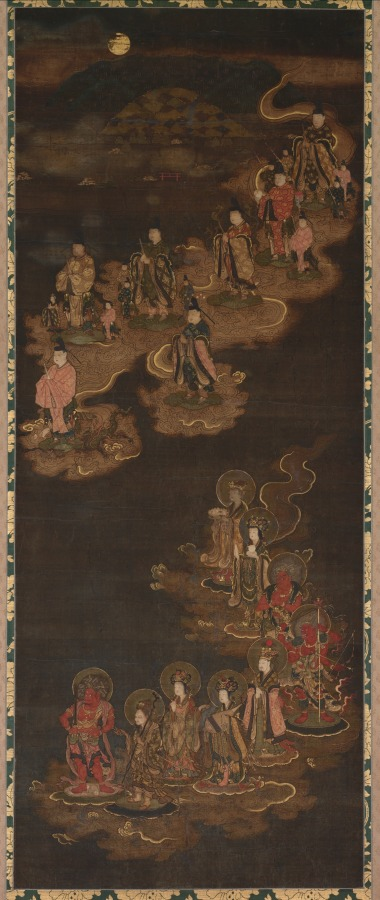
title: Descent of the Nine Luminaries and the Seven Stars at Kasuga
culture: Japan, Nanbokuchō period (1336–92)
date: mid- to late 1300s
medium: Hanging scroll; ink, color, gold and cut gold on silk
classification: Painting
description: This medieval religious painting shows celestial beings descending from the heavens into the Kasuga Shrine, a major religious site in Japan's ancient capital, Nara. The moon and the Kasuga mountain range appear in the uppermost portion of the painting, as does a red shrine entrance gate, or torii. In the upper part of the painting, figural representations of the stars in the constellation known as the Big Dipper in the West descend from right to left on cloud banks. In the lower part, the Nine Luminaries (Sanskrit: Navagraha) that emerged from the Vedic tradition—the sun and moon; the planets Jupiter, Mars, Saturn, Venus, and Mercury; and personifications of the fluctuating lunar nodes—descend in similar fashion. The painting uses the "deities in descent" scheme originating in China, as well as the original Buddhist form mandala (Japanese: honjibutsu mandarazu) format prevalent in medieval Japanese Shinto-Buddhist painting, to generate an image connected to the worship of celestial bodies in Esoteric Buddhism.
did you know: A 19th-century copy of this painting in ink and light color exists at the Kyoto City University of Arts.